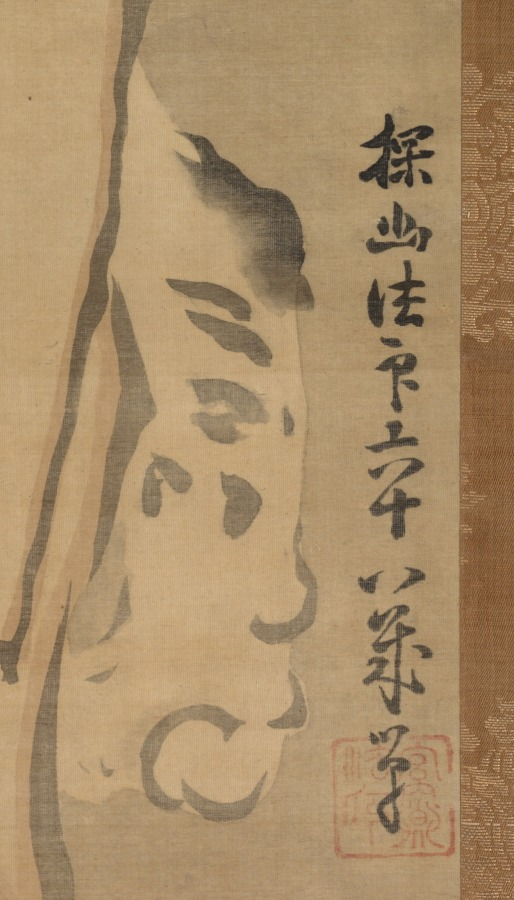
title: A Sage with Tiger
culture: Japan, Edo period (1615–1868)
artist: Kano Tan’yū (Japanese, 1602–1674)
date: 1661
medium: One of a triptych of hanging scrolls; ink and slight color on silk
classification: Painting